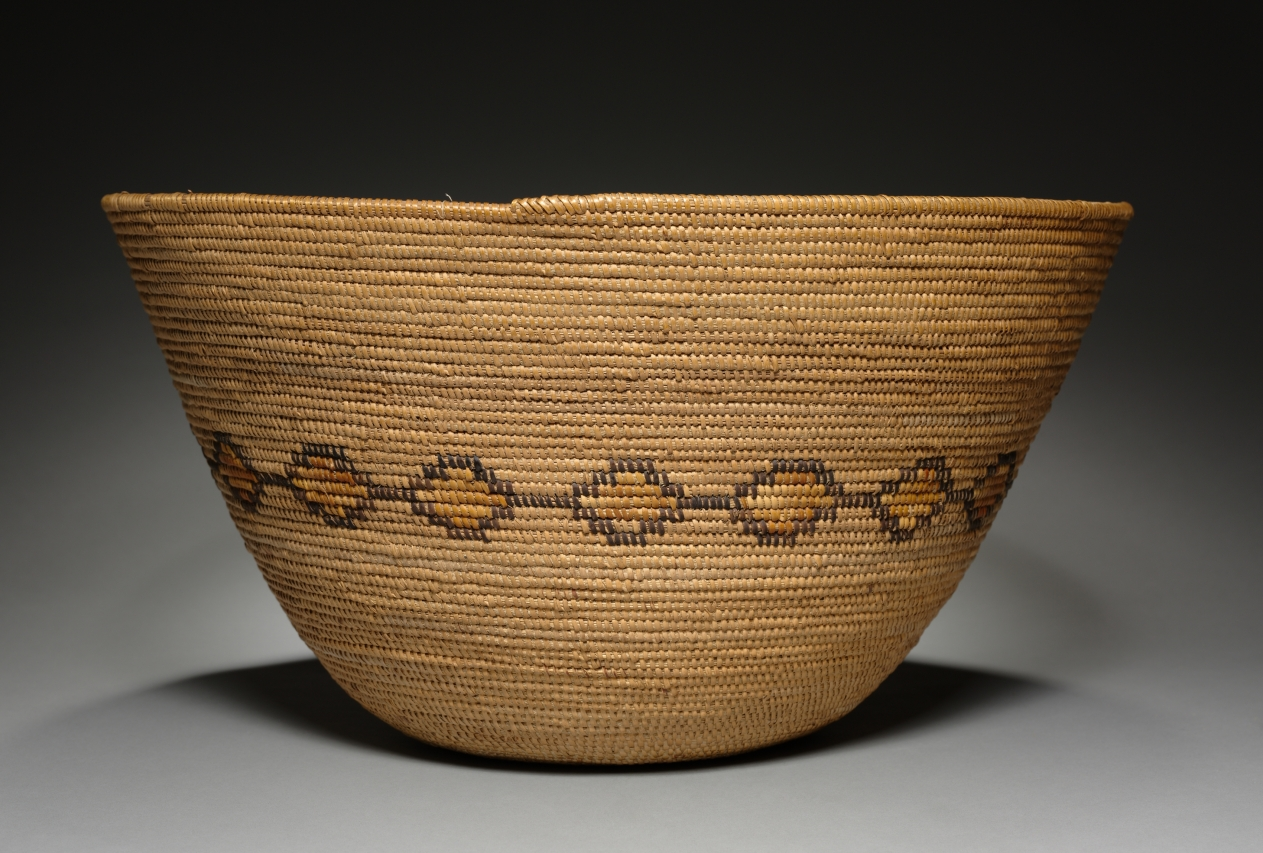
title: Food / Carrying Bowl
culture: California, Southern, Gabrielino (San Gabriel, Mission, or Tongva), 20th century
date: before 1929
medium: coiled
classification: Basketry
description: CMA Bulletin, December 1930